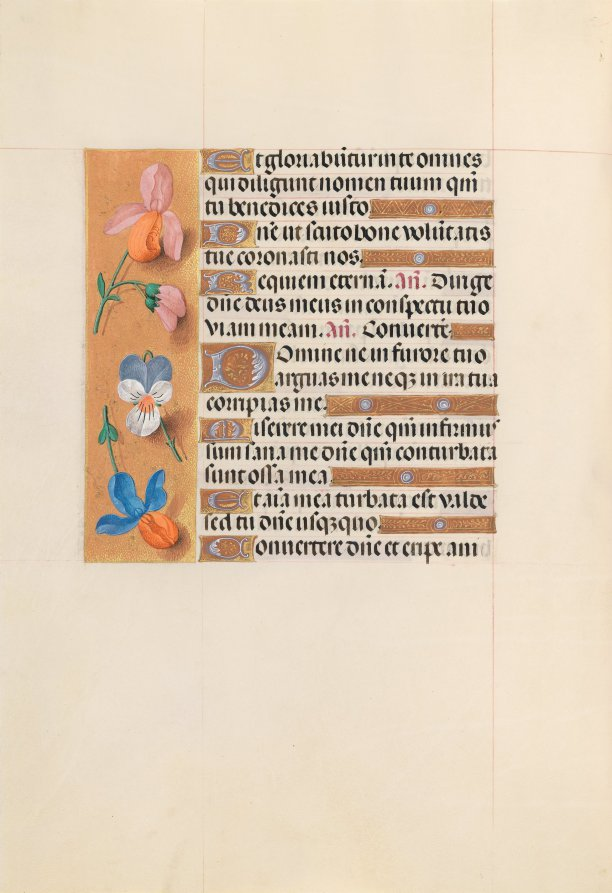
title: Hours of Queen Isabella the Catholic, Queen of Spain: Fol. 228v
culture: Flanders, Ghent and Bruges, late 15th century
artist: Master of the First Prayerbook of Maximillian (Flemish, c. 1444–1519)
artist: and Associates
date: c. 1500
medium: ink, tempera, and gold on vellum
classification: Bound Volume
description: This manuscript was illuminated by a circle of at least five highly organized manuscript painters active in the Flemish cities of Ghent and Bruges. The principal illuminator was Alexander Bening, who painted the majority of the book's miniatures. Manuscripts produced by this circle of artists are renowned for the decoration of their borders, which typically feature a rich variety of realistically-painted flowers, birds, and butterflies. This prayer book, called a book of hours, was intended not for a cleric, but for the private devotions of a lay person-in this case, Isabella the Catholic, Queen of Spain (1451-1504). Isabella's coat of arms embellishes the book's frontispiece. It is unlikely that the book was commissioned by the Queen herself; rather, she probably received it as a diplomatic gift from someone courting her patronage, perhaps Cardinal Francisco Jimenez de Cisneros. A Franciscan friar, Jimenez was dependent upon Isabella for his advancement, first to the post of Queen's confessor in 1492, and then to Archbishop of Toledo in 1495.